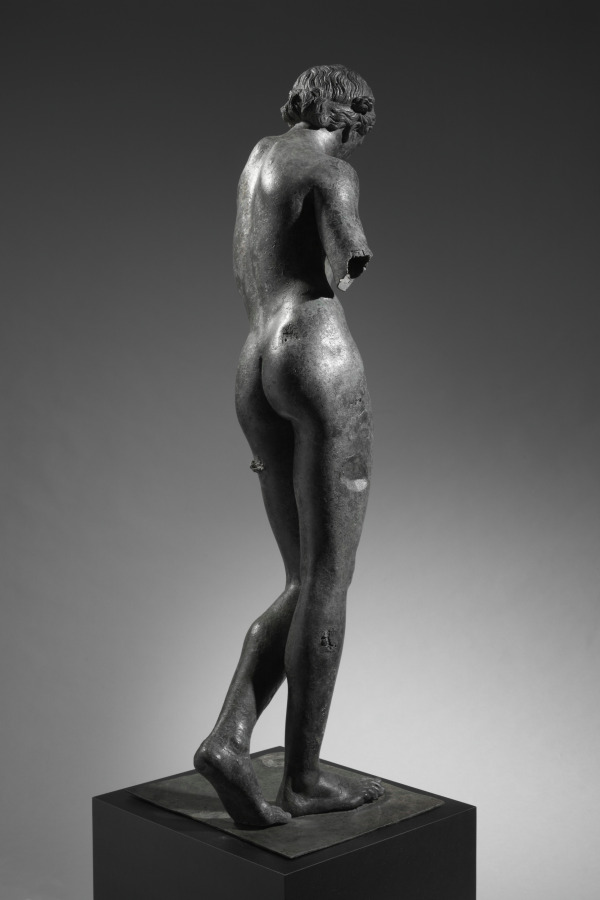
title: The Cleveland Apollo: Apollo Sauroktonos (Lizard-Slayer) or Apollo the Python-Slayer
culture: Greece, Athens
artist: attributed to Praxiteles (Greek, Athenian, c. 400–330 BCE)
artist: or Follower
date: c. 350–200 BCE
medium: bronze, copper and stone inlay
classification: Sculpture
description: The Cleveland Apollo was cast in multiple sections using the indirect lost-wax technique. First, molds were taken from a working model (now no longer known or preserved), which was then reproduced in hollow wax sections, each filled with a clay core. After details were added to the wax models, each was encased in clay. Then, the wax was heated, melted out, and replaced by molten bronze. Once cooled, the hollow bronze sections were fused together and finished, patching flaws and adding inlays and other details. Since the initial model was retained, it could be reused, allowing ancient sculptors to create multiples and variations of favorite works. Thus, remarkably, the Cleveland Apollo may once have been one of several such works. The consistently thin walls of the Cleveland Apollo (mostly 5-6 mm thick), together with the nearly invisible joins between most cast sections, show that it was created by highly skilled sculptors and foundry workers. Close looking reveals several noteworthy features. First, ovals atop the right foot mark a fusion weld, where molten bronze pooled to join separately cast sections. Second, small rectangular bronze patches cover parts of the surface (especially the right hip), each carefully cut and then hammered into place over holes or other casting defects. Inlaid lips, nipples, and eyes (the right ancient stone, the left now a modern replacement) added to the lifelike appearance of the sculpture, contrasting with the once bronze-colored skin. Finally, radiography helps to illuminate hidden features, such as the cast edge of the neck of Apollo.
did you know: Ovals across the top of the right foot show a clear join between separately cast sections.